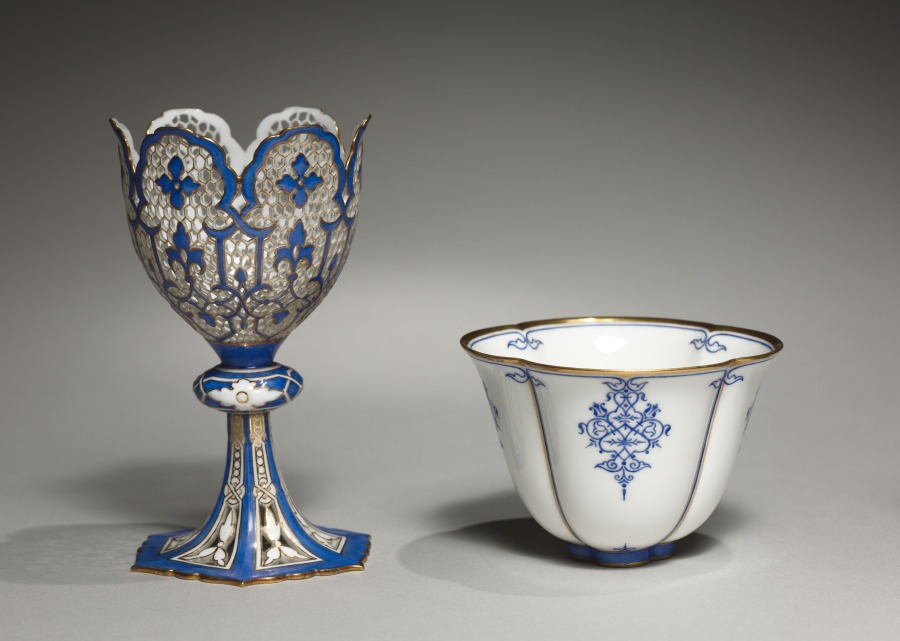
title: Cupholder (Zarf) and Cup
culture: France, Sèvres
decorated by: Guyonnet (French)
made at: Sèvres Porcelain Factory (French, est. 1756)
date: c. 1848–55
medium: hard-paste porcelain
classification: Ceramic